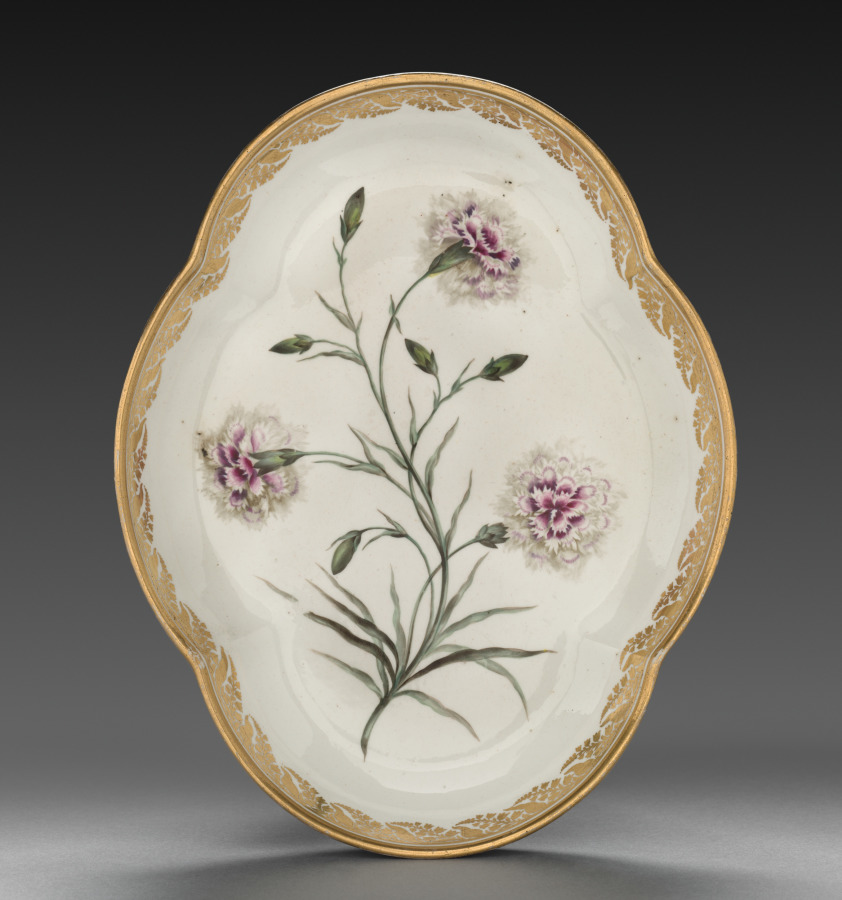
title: Quatrelobed Dish from Dessert Service: Pinks--Maddocks Beauty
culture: England, Derby, 18th century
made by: Derby (Crown Derby Period) (British)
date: c. 1800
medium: porcelain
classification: Ceramic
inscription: inscribed in blue on back: Dianthus Superbus./Pinks./Maddocks Beauty./crown/crossed batons and dots/D/115.